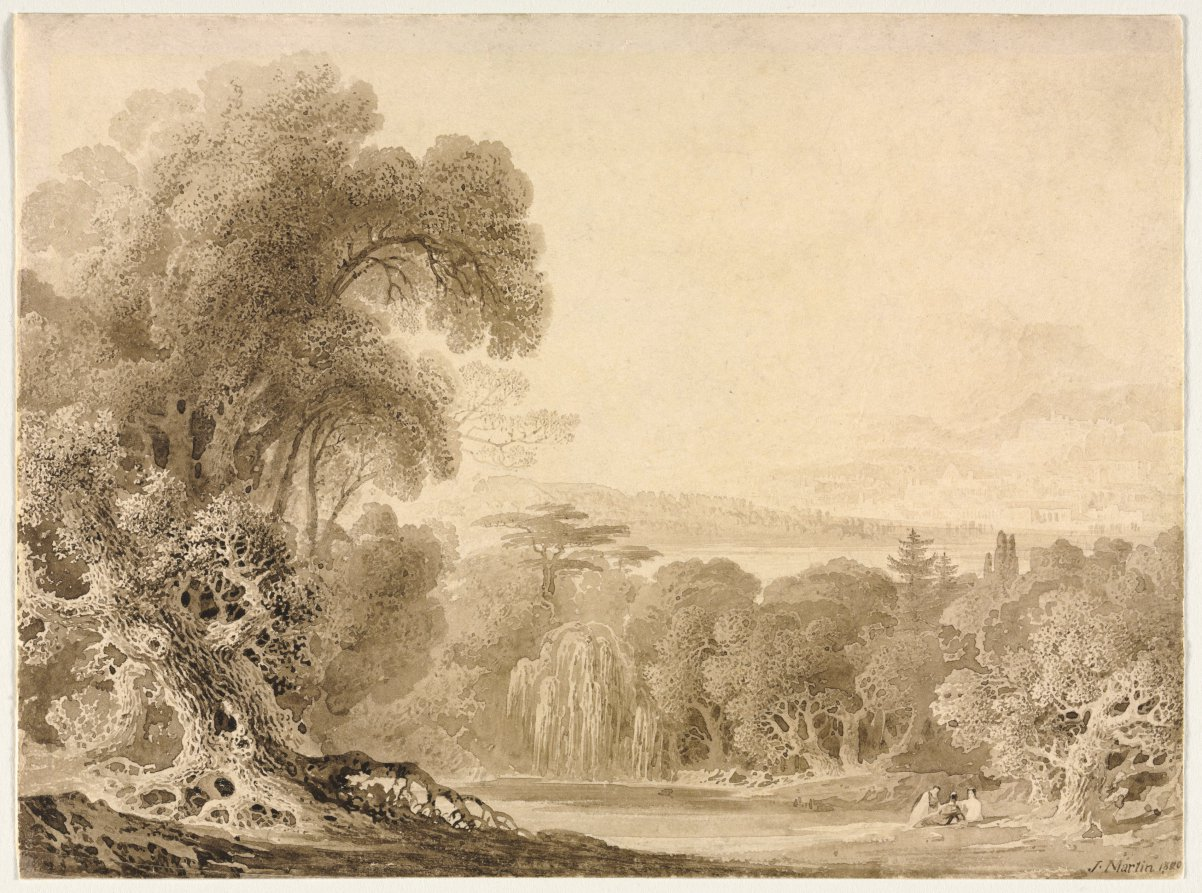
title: Figures Seated by a Lake in a Wooded Landscape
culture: England, 19th century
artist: John Martin (British, 1789–1854)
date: 1820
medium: brown wash and point of brush with graphite underdrawing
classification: Drawing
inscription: signed and dated, in brown ink, at lower right: J. Martin 1820; inscribed, in graphite, on verso, at center: William / No. 3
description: Before he became famous as a history painter, John Martin earned a living by teaching and painting watercolors. His so-called sepia drawings, landscapes in monochromatic wash, found an enthusiastic audience. The artist’s method for painting foliage in these drawings was idiosyncratic; form and texture were created almost entirely in negative spaces without the use of line. Highlighted leaves, bark, vines, and roots were delineated with the white of the paper, creating a peculiar, instantly recognizable, spongy effect.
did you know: John Martin's biographer believed that his early landscapes, such as this one, were inspired by classical texts by Ovid.